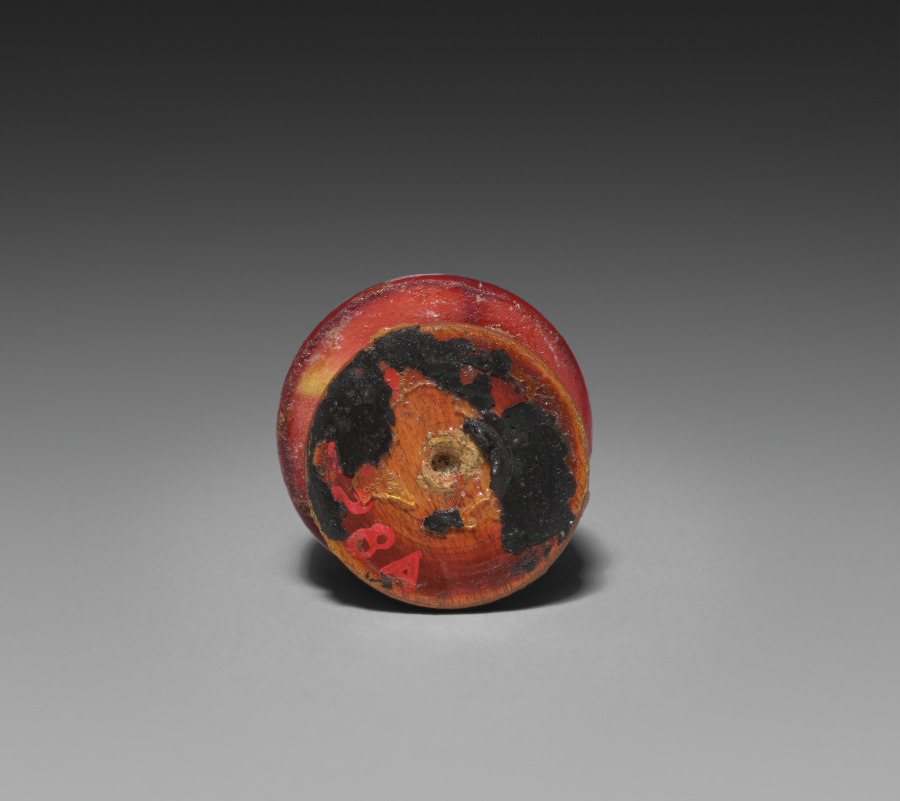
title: Snuff Bottle with Stopper (stopper)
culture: China, Qing dynasty (1644–1911), Qianlong reign (1736–95)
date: 1736–95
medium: crystal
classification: Stone